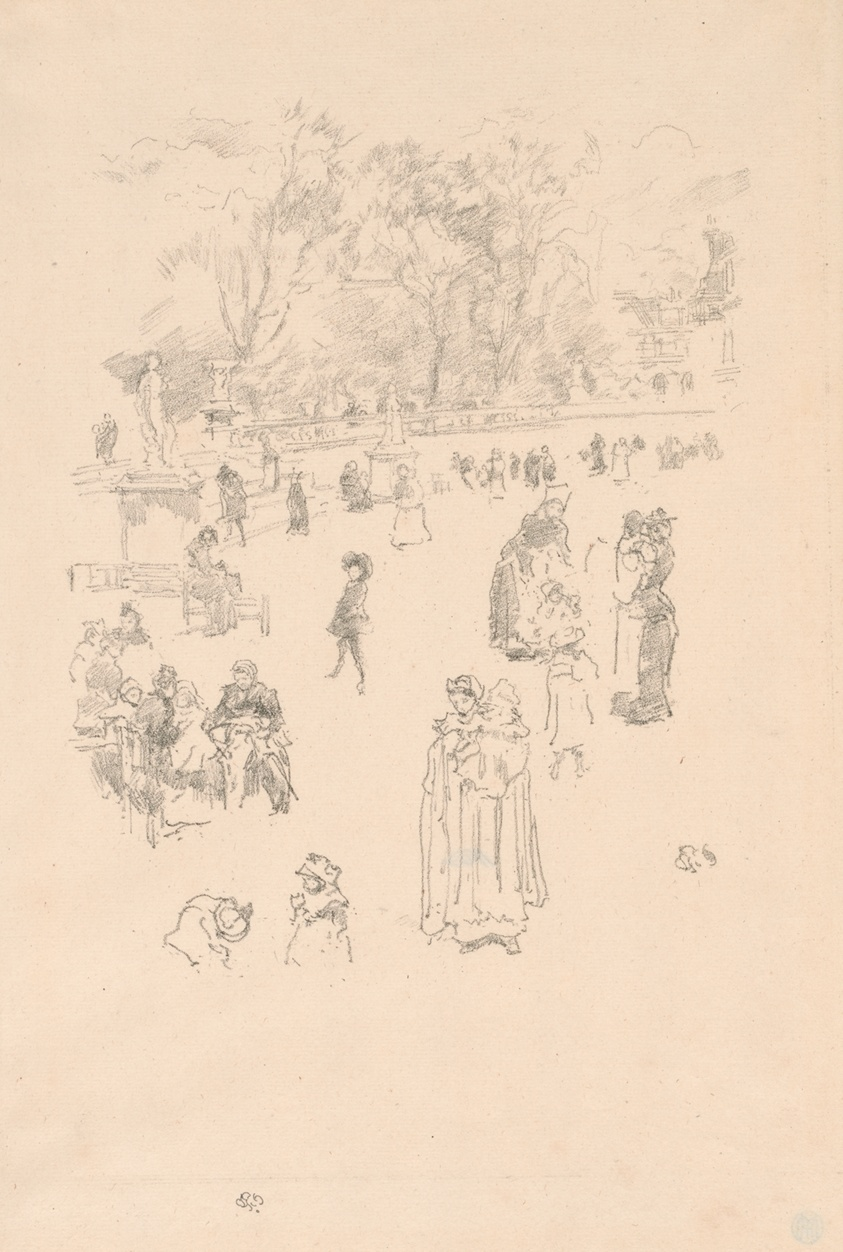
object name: Print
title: Nursemaids: "Les Bonnes du Luxembourg"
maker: James McNeill Whistler (American, 1834-1903)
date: 1894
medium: Transfer lithograph in black on cream laid paper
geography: United States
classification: transfer lithograph; lithograph; print; prints and drawing; paper